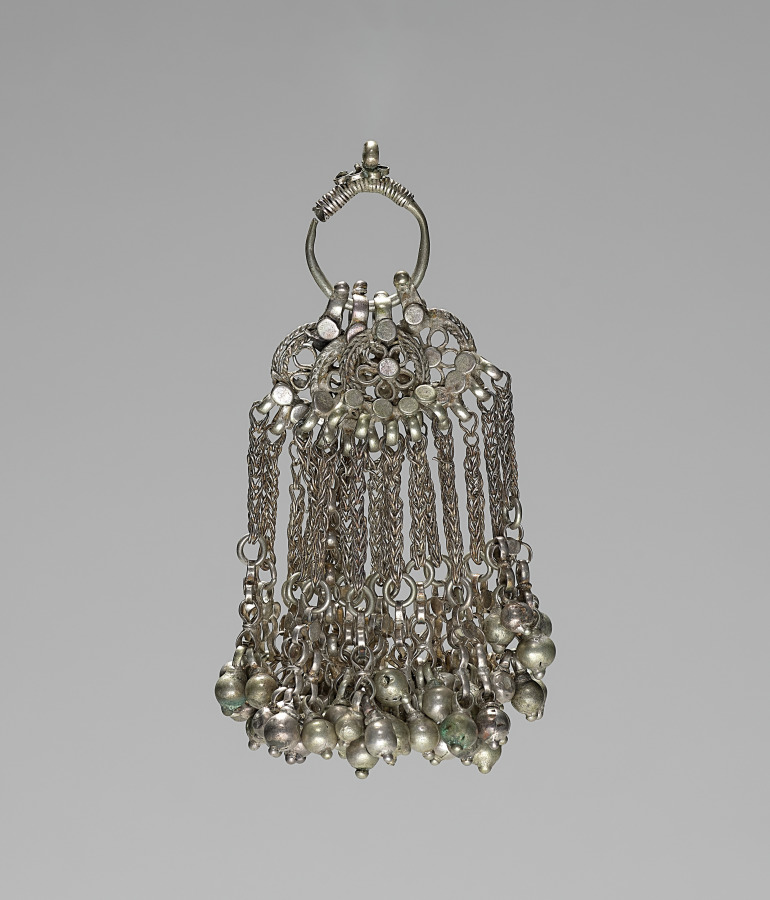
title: Earring (?)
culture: India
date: before 1916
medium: silver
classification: Jewelry